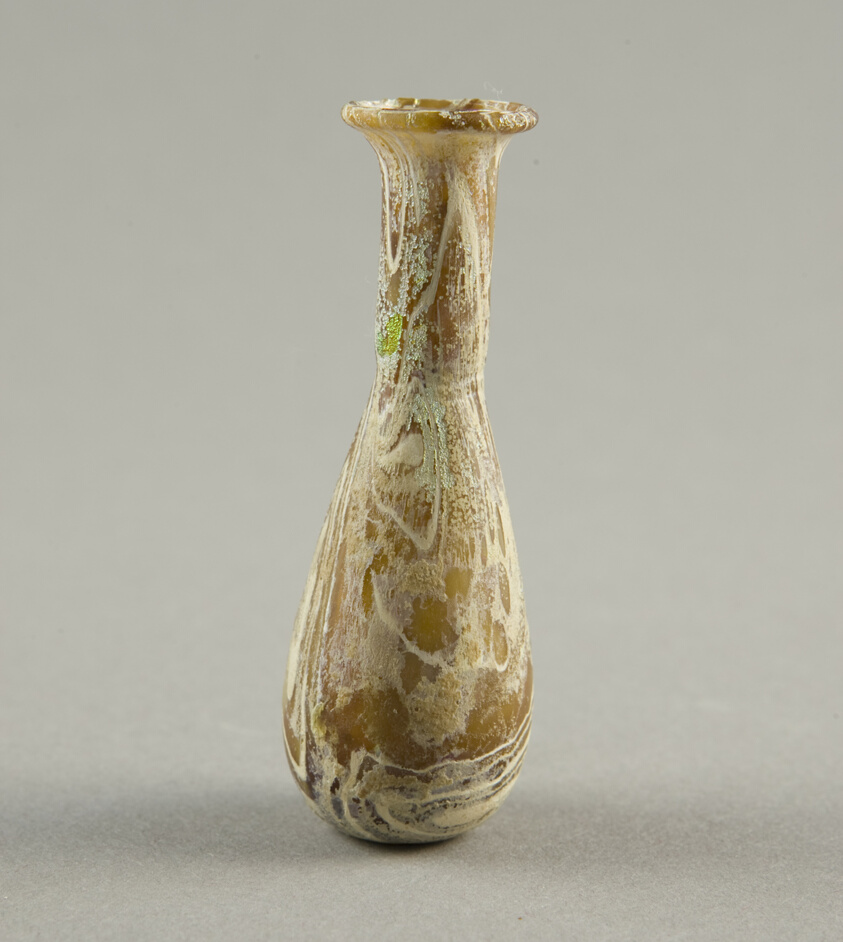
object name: Vessel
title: Bottle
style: syrian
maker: Roman; Levant or Syria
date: 1st century BCE-1st century CE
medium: Glass, blown technique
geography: Syria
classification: bottle; glass; vessel; ancient art